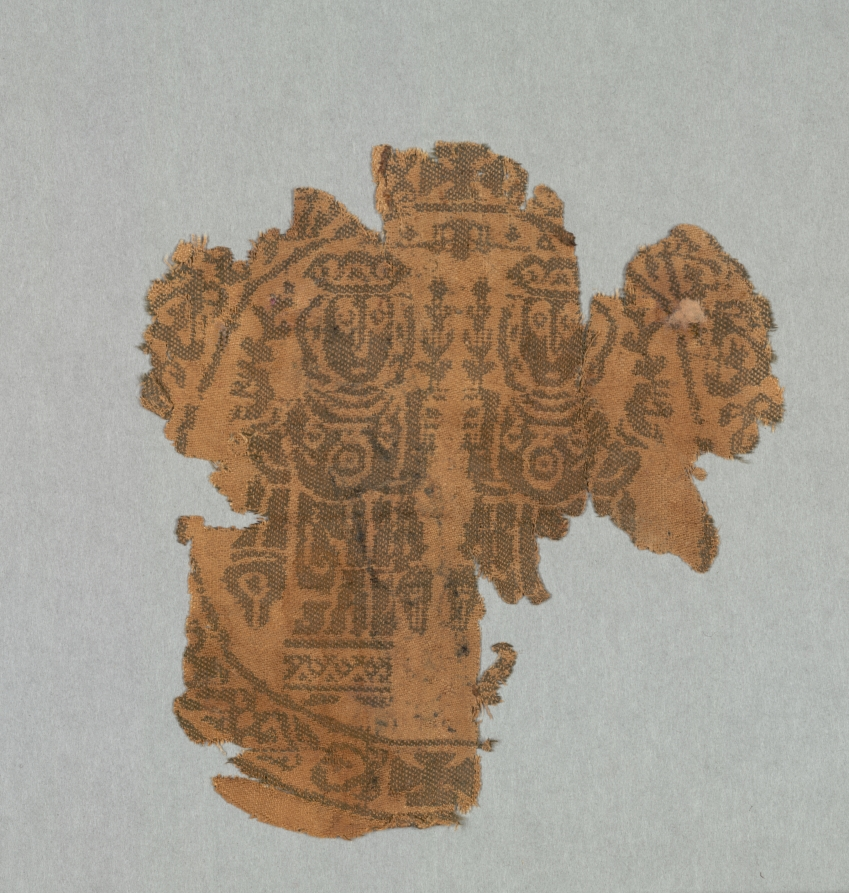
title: Fragmentary Roundel, Segmentum from a Tunic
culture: Syria, Akhmim, late 8th - early 9th centuries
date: late 700s–early 800s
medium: compound twill, silk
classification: Textile